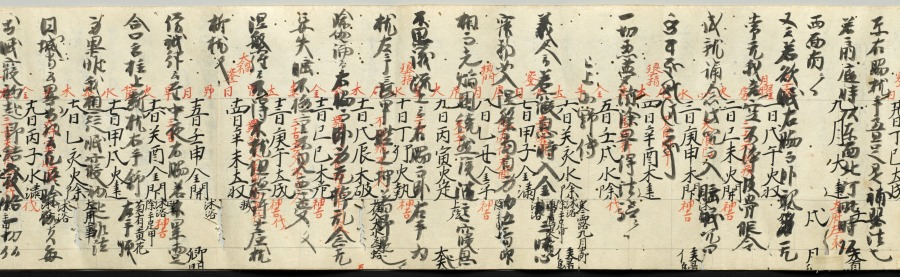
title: Scroll of Miscellaneous Notes written on a Calendar by Priest Seigen (verso)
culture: Japan, Kamakura period (1185–1333)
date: c. 1200–1231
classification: Manuscript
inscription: bears miscellaneous notes written by Priest Seigen.